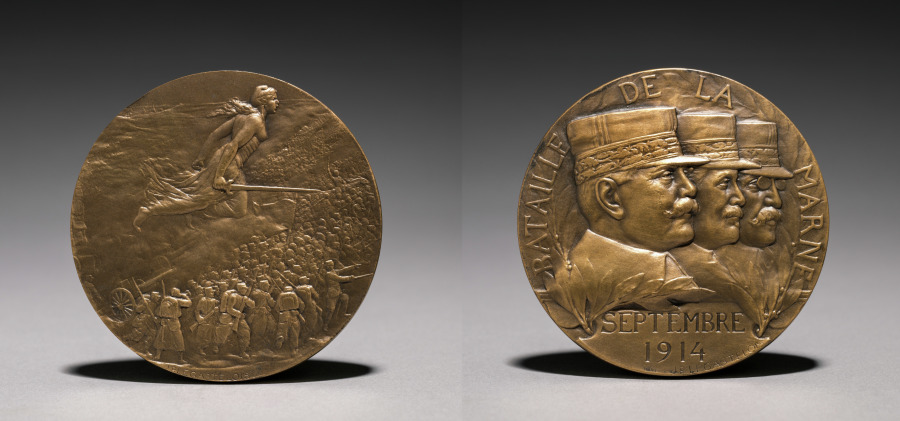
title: Medal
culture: France, 20th century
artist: Jules Prosper Legastelois (French, 1855–1931)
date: 1914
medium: bronze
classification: Metalwork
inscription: Bataille de la Marne, September, 1914.